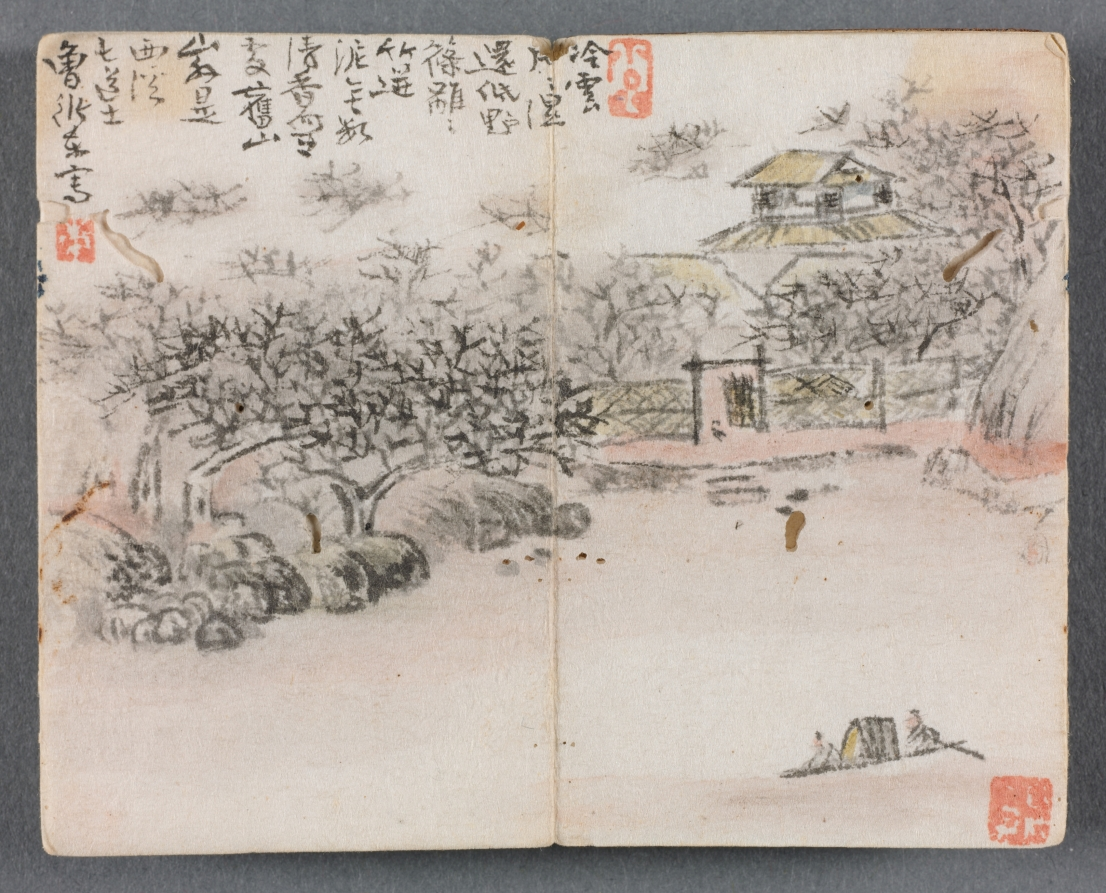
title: Miniature Album with Figures and Landscape (Landscape with Two Boatmen)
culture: China, Qing dynasty (1644–1911), Qianlong reign (1736–95)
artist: Zeng Yandong (Chinese, c. 1751–1827)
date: 1822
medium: album leaf, ink and color on paper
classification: Painting